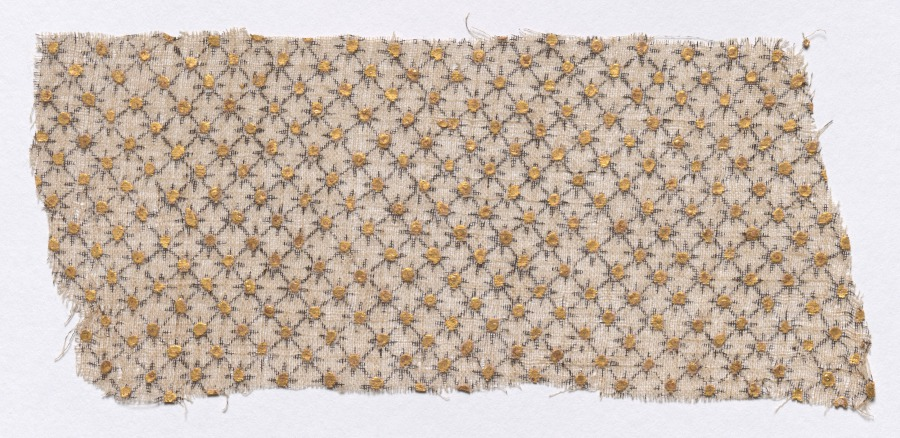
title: Fragment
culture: India, Rajasthan or Northern Deccan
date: 1800s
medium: Block printed and overprinted gold leaf (varak) on undyed plain weave cotton muslin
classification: Textile